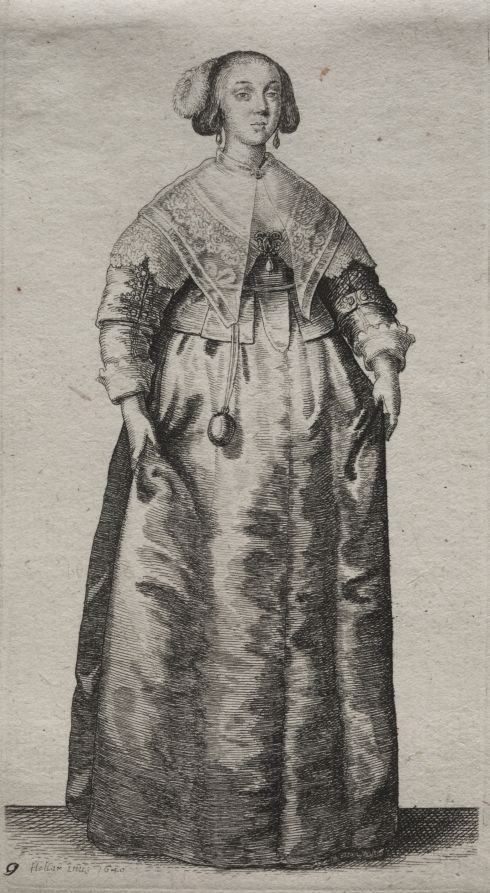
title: The Several Habits of English Women, from the Nobility to the Country Women as they are in these times: The Woman with a Marble Sphere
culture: Bohemia, 17th century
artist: Wenceslaus Hollar (Bohemian, 1607–1677)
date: 1640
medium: etching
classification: Print